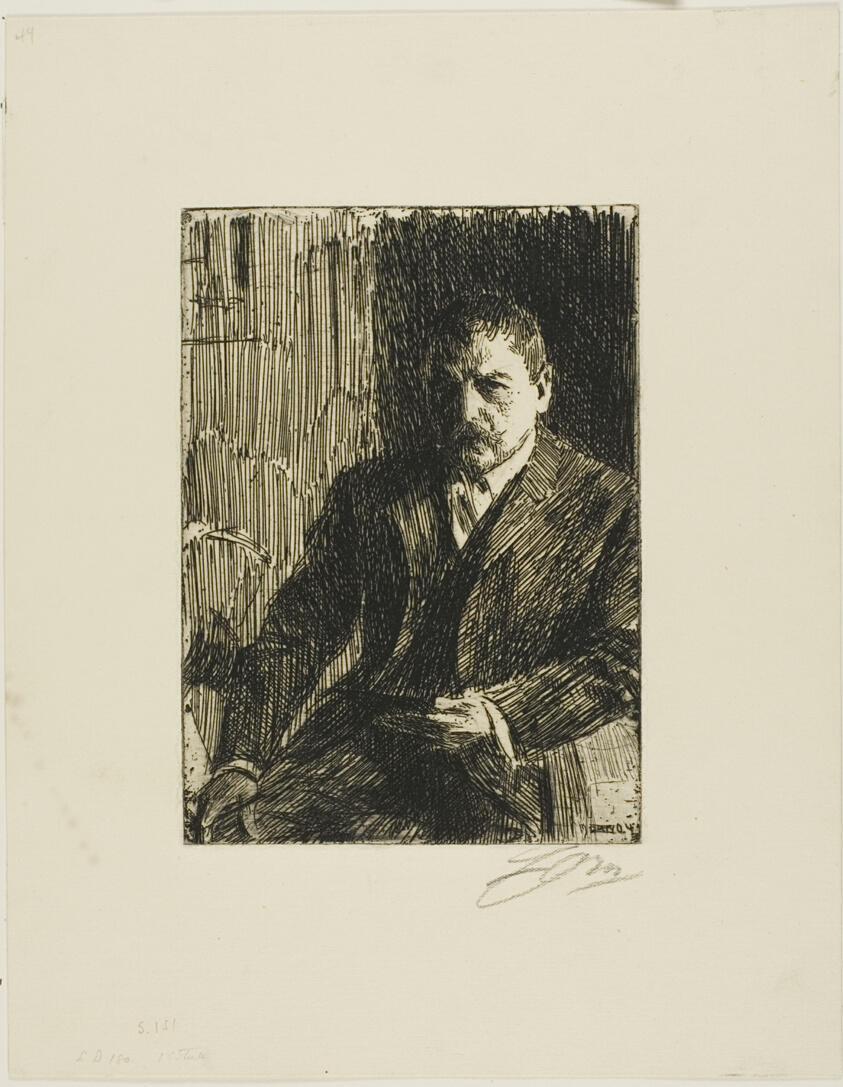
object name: Print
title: Self-Portrait 1904 I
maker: Anders Zorn (Swedish, 1860-1920)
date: 1904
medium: Etching on ivory laid paper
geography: Sweden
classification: etching; print; prints and drawing